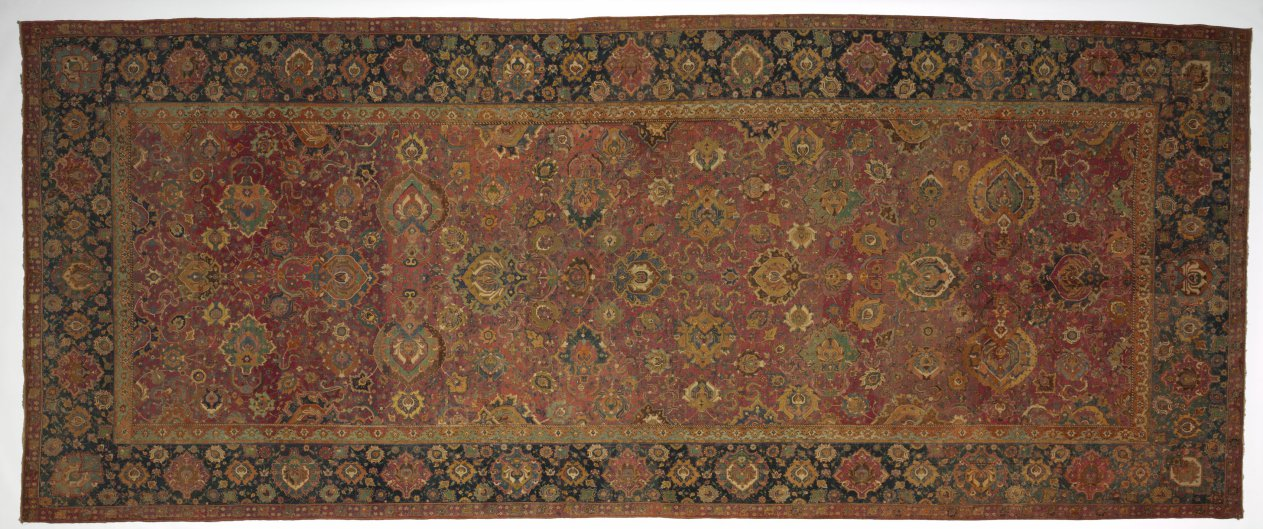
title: Carpet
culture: Iran, Herat, 16th century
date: 1500s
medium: senna knot: wool and cotton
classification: Carpet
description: The Mughals, with their nomadic Central Asian roots, were constantly on the move. They were adept at transporting the trappings of their residences and bases of operation from place to place. Fine carpets and canopies demarcated places of importance, and could be rolled up and moved when the ruler was ready to consolidate his power at a new location. When they settled in stone palaces in India, the interiors were covered with carpets, lending a warmth to the spaces that cannot be felt at the sites today. This carpet is of the type that the Mughals would have acquired for their residences. Mughal paintings are filled with depictions of carpets and textiles, many ornamented, like this one, with delicate and complex palmette-dominated arabesque patterns that evoke a paradisiacal setting.